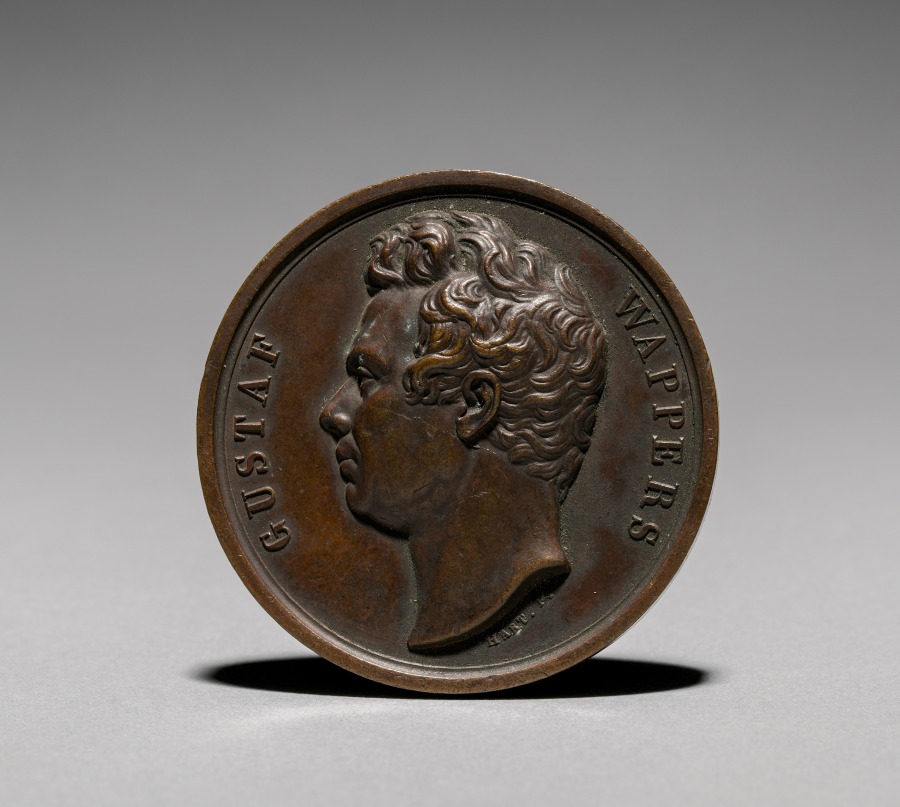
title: Medal: Gustaf Wappers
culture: 19th century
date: 1800s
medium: bronze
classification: Metalwork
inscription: "GUSTAF WAPPERS"; signed: "Hart. F."